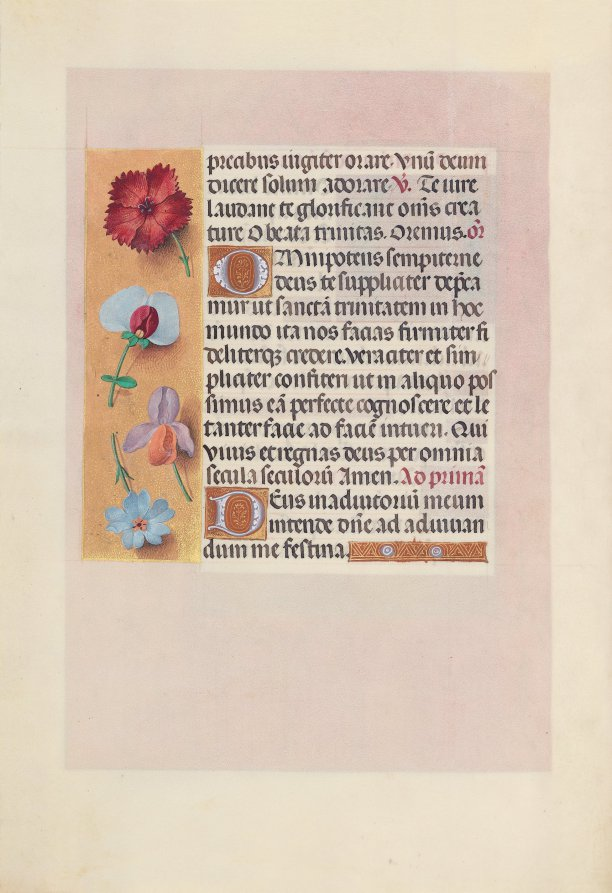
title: Hours of Queen Isabella the Catholic, Queen of Spain: Fol. 18v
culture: Flanders, Ghent and Bruges, late 15th century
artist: Master of the First Prayerbook of Maximillian (Flemish, c. 1444–1519)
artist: and Associates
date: c. 1500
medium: ink, tempera, and gold on vellum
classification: Bound Volume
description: This manuscript was illuminated by a circle of at least five highly organized manuscript painters active in the Flemish cities of Ghent and Bruges. The principal illuminator was Alexander Bening, who painted the majority of the book's miniatures. Manuscripts produced by this circle of artists are renowned for the decoration of their borders, which typically feature a rich variety of realistically-painted flowers, birds, and butterflies. This prayer book, called a book of hours, was intended not for a cleric, but for the private devotions of a lay person-in this case, Isabella the Catholic, Queen of Spain (1451-1504). Isabella's coat of arms embellishes the book's frontispiece. It is unlikely that the book was commissioned by the Queen herself; rather, she probably received it as a diplomatic gift from someone courting her patronage, perhaps Cardinal Francisco Jimenez de Cisneros. A Franciscan friar, Jimenez was dependent upon Isabella for his advancement, first to the post of Queen's confessor in 1492, and then to Archbishop of Toledo in 1495.